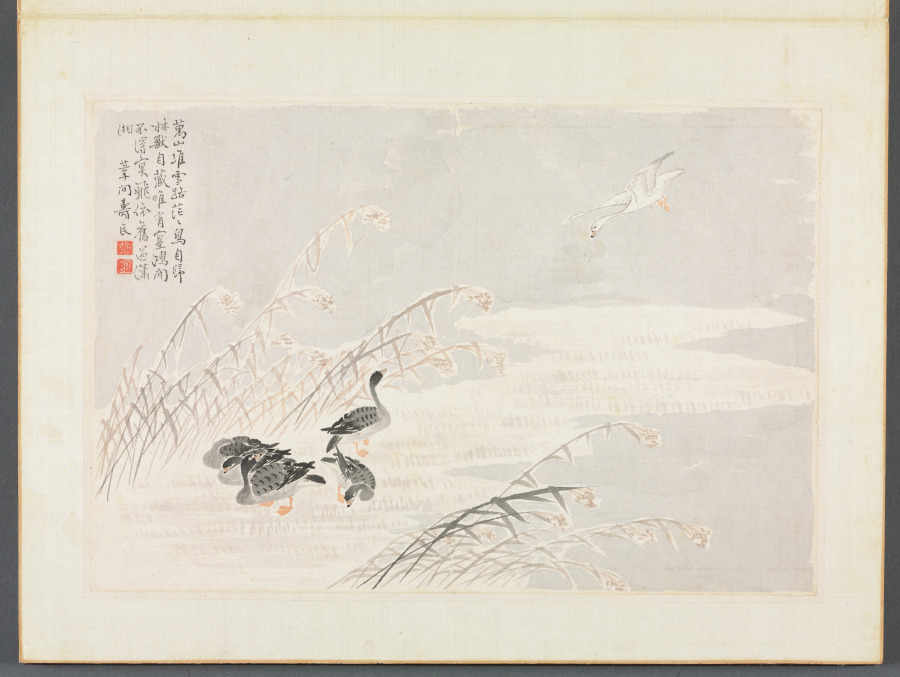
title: Album of Calligraphy and Paintings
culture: China, Qing dynasty (1644-1911)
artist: Bian Shoumin (Chinese, 1684–1752)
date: first half of the 1700s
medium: album leaf; ink and color on paper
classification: Painting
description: The artist Bian Shoumin is known for his depiction of wild geese, water, and reeds. The migrant birds in autumn and winter evoked, in the minds of the Chinese intelligentsia, a time of parting and sorrow.